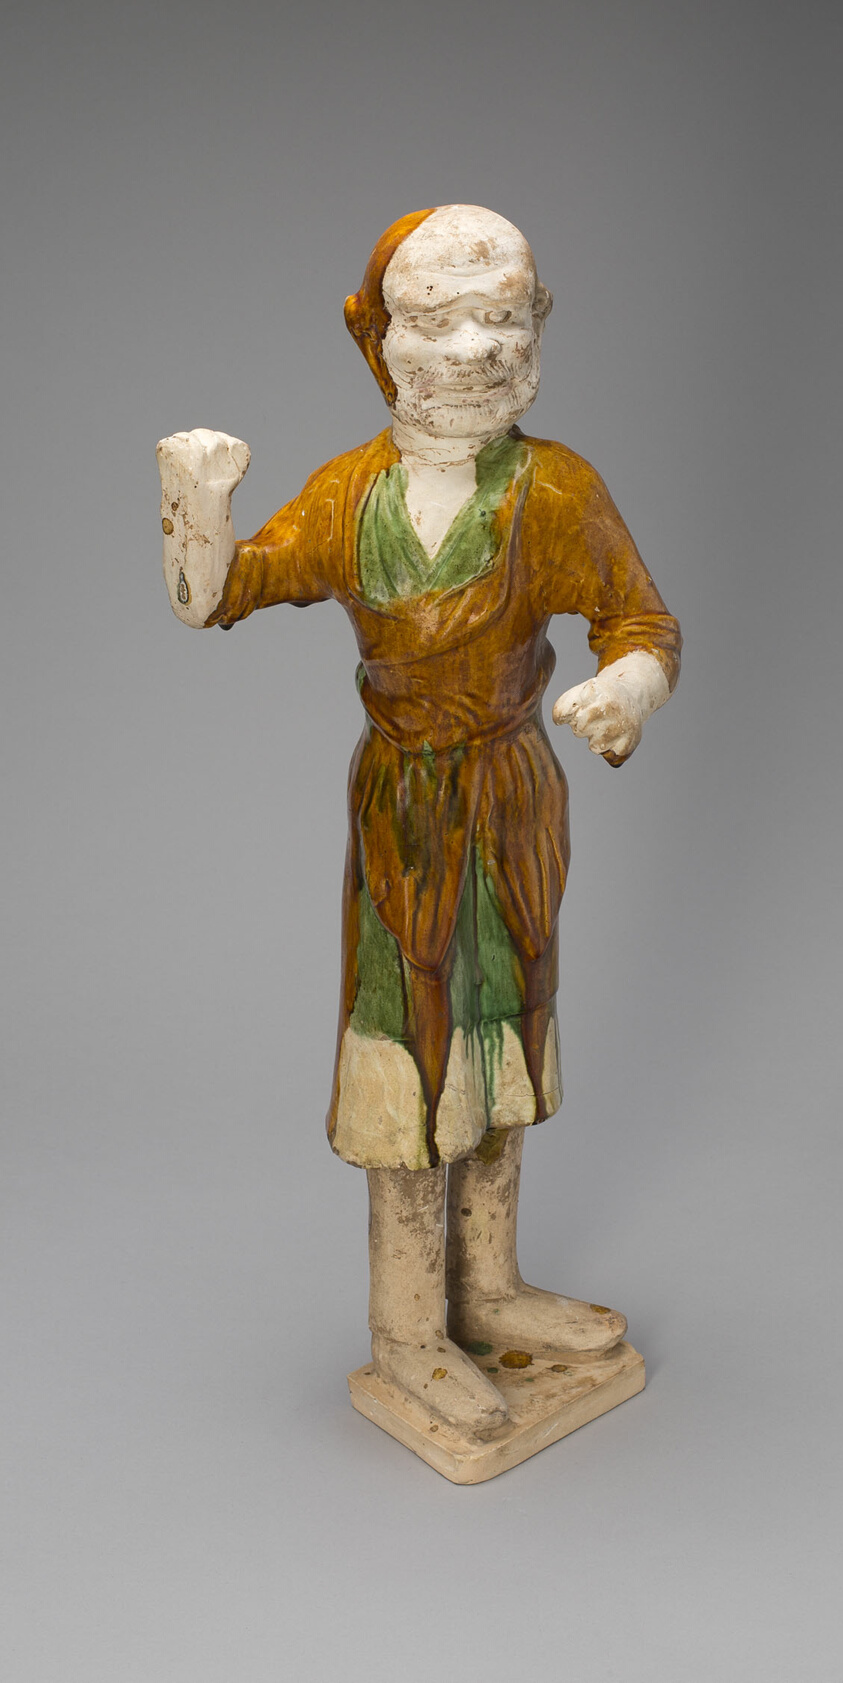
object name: Sculpture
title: Groom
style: Chinese (culture or style)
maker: China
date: Tang dynasty (618–907), first half of 8th century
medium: Earthenware with three-color (sancai) lead glazes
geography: China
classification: earthenware; ceramics; asian art; sculpture